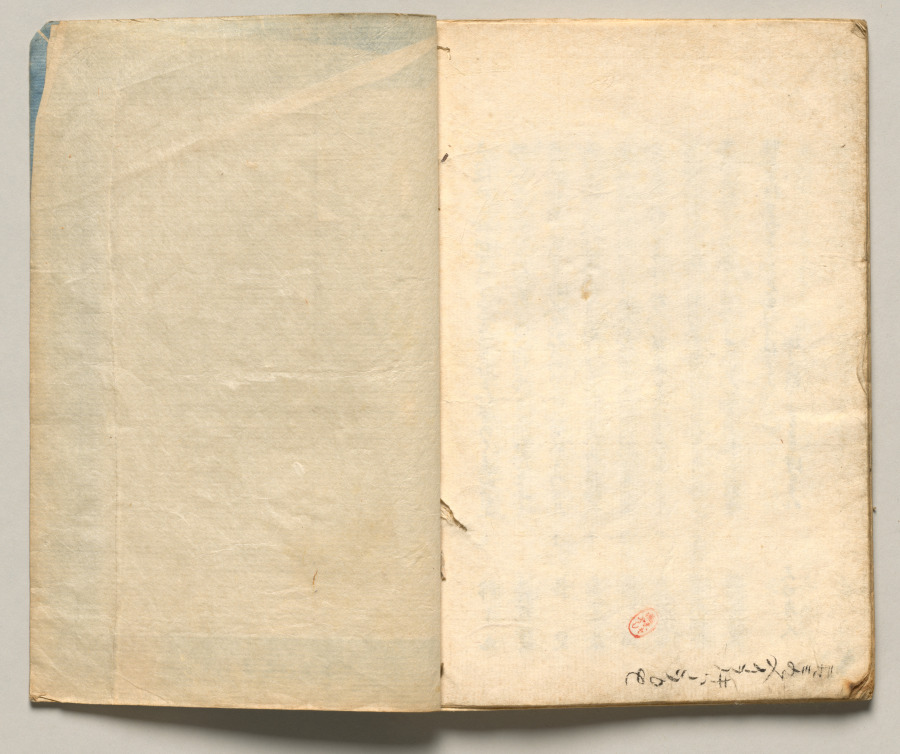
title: Spread Twenty from Volume Seven of People of Japan in Light Verse (Kyōka)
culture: Japan, Edo period (1615–1868)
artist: Utagawa Hiroshige (Japanese, 1797–1858)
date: 1857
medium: Woodblock-printed book; ink and color on paper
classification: Bound Volume